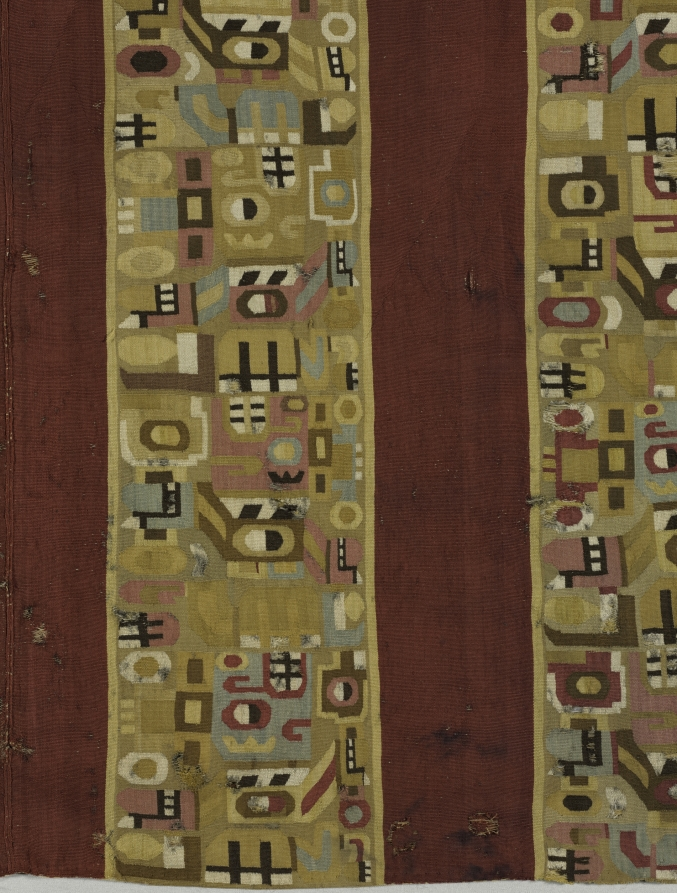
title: Tunic with Sacrificer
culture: South America, Peru, Central Andes, Middle Horizon, Wari people, 7th-11th century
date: 600–1000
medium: camelid-fiber, cotton; tapestry weave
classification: Textile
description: An extremely abstract supernatural sacrifice repeats in different colors and orientations across the body of this tunic, which was shortened on one side in antiquity. Look for the toothy black-and-white mouth in the sacrificer's upward-gazing head; other facial features include a button nose and a vertically divided eye. The figure holds the L-shaped haft of an axe behind its back and, at the front of its body, a short staff with a severed, upside-down human head on the top.